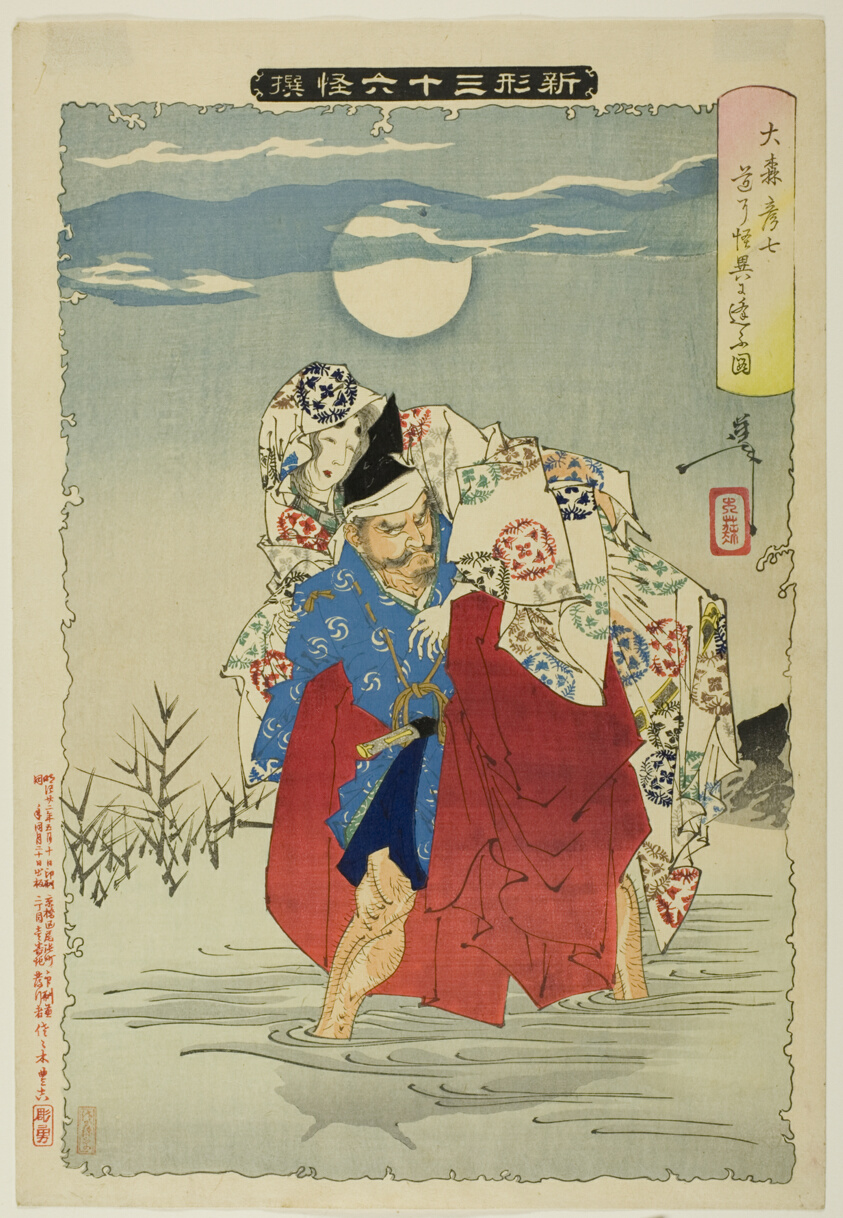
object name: Print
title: Omori Hikoshichi from the series “New Forms of the Thirty-Six Ghosts”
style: Japanese (culture or style)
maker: Tsukioka Yoshitoshi (Japanese, 1839–1892)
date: 1889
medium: Color woodblock print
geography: Japan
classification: woodblock print; print